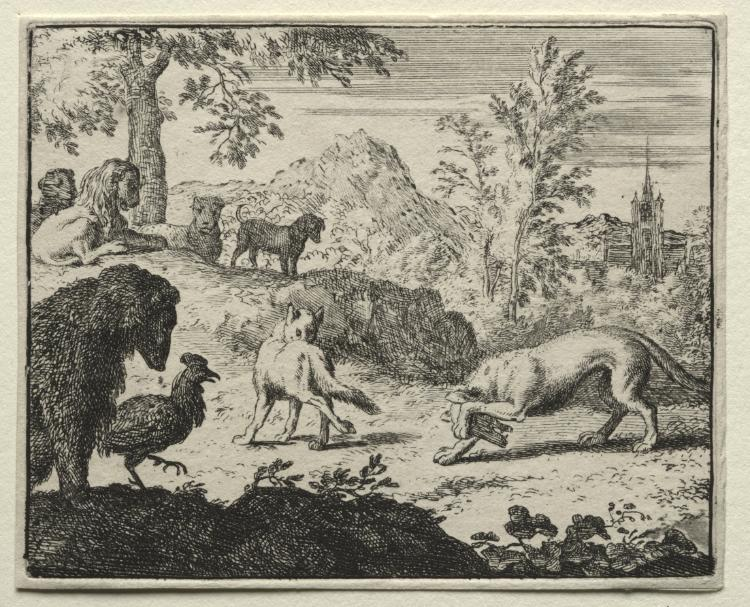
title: Reynard the Fox: The Combat Between Reynard and the Wolf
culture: Netherlands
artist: Allart van Everdingen (Dutch, 1621–1675)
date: 1650–75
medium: etching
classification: Print